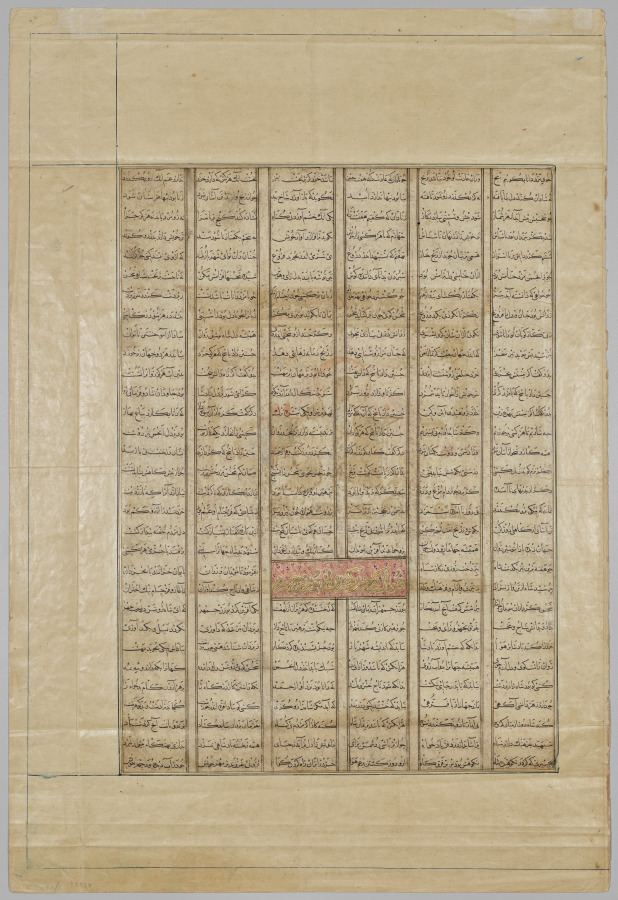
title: Persian Verses: The Fortieth Year of King Kisra Nushirwan's Reign and the Story of Buzurgmihr (recto) from a Shahnama (Book of Kings) of Firdausi (940–1019 or 1025)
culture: Iran, Tabriz, Ilkhanid period (1256-1353)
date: 1330–35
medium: Ink and opaque watercolor on paper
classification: Manuscript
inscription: Script: Naskh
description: Mongol interest in the production of illustrated manuscripts eventually focused on Persian epic poetry. The Shahnama, a compilation of the epics and tales of Iran's legendary heroes, was a natural choice; the book included many subjects that suited Mongol taste, such as banquets, battles, hunting, and magical or fantastic events. The painting on the other side of this page is of the Sasanian ruler of Iran, Khusraw I Anushirwan (531–579), descendant of Bahram Gur. Above the king's head an inscription reads, "Picture of Nushirwan the Just." The figure in the elaborate turban to the left of the king is probably the young Minister Buzurgmihr, famous for his wisdom and virtue. To celebrate the explanation of a troublesome dream by Buzurgmihr, Nushirwan held a series of seven banquets. The text around this painting describes the fifth banquet.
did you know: The Mongol rulers of Iran placed high value on illustrated manuscripts, especially histories, and established royal library-workshops.